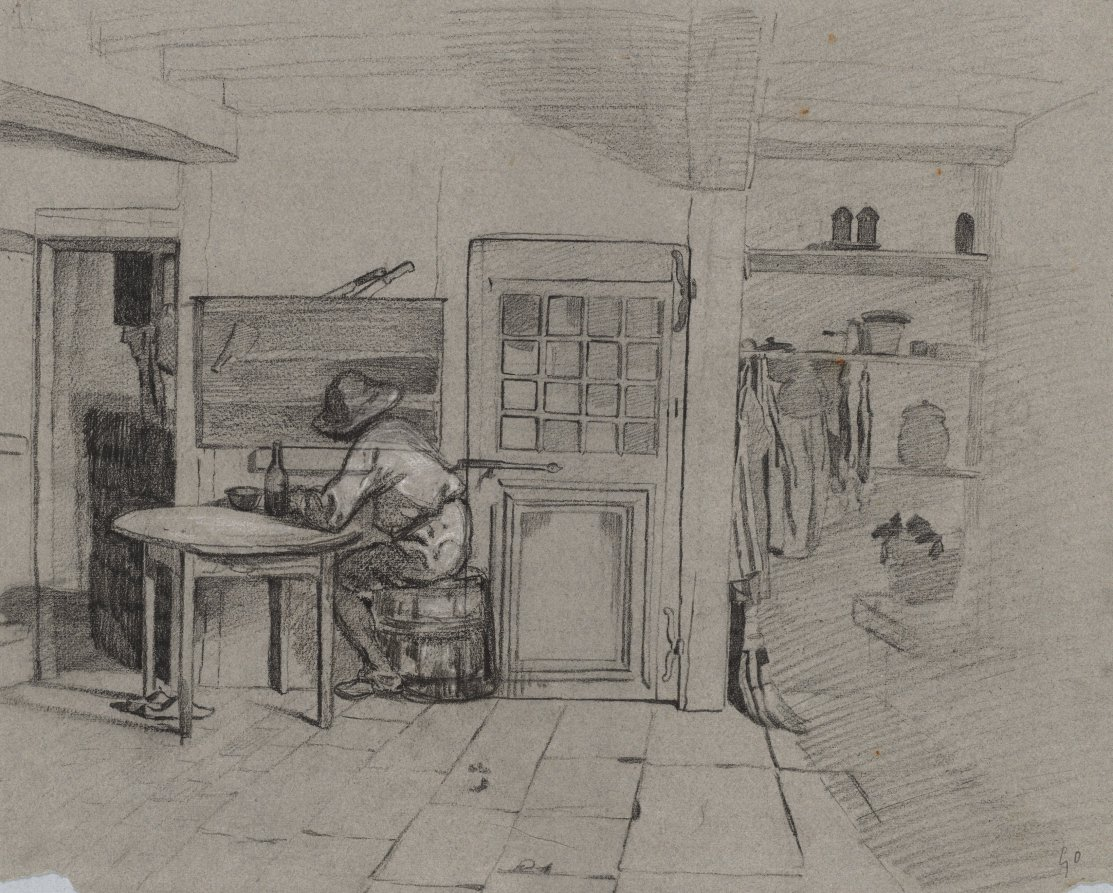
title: A Farmhouse Interior with a Boy at a Table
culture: France, 19th century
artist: Alexandre-Gabriel Decamps (French, 1803–1860)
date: c. 1846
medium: black chalk heightened with white chalk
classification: Drawing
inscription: signed, lower right, in graphite: GD ; SECONDARY SUPPORT, lower right, stamped in blue ink: Vente DECAMPS ; VERSO, lower right, in graphite: 5. [circled and upsidedown]